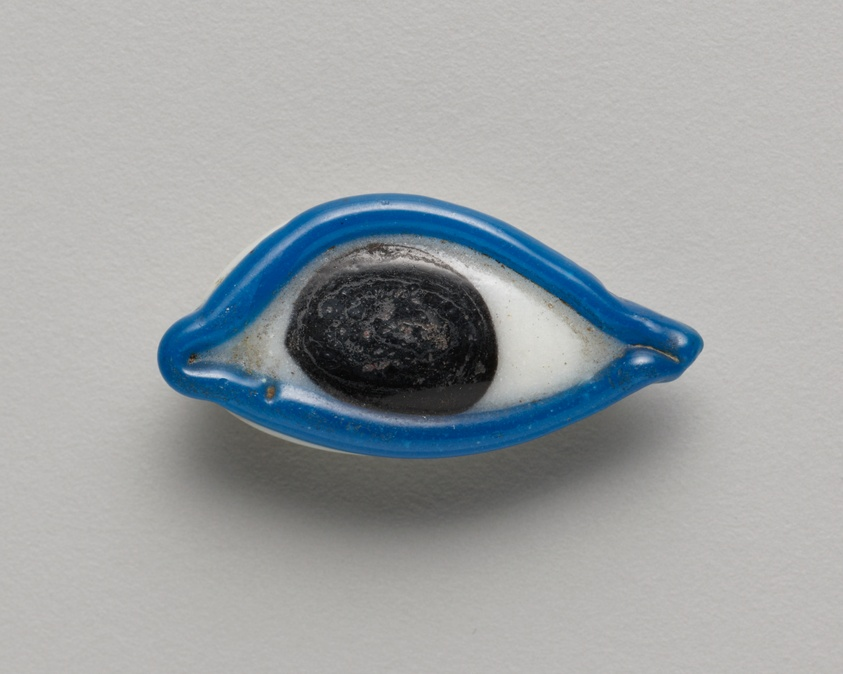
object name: Costume and Accessories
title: Amulet of a Left Eye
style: greco-roman (egyptian), ancient, egyptian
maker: Egyptian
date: New Kingdom–Late Period (about 1550–332 BCE)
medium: Glass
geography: Egypt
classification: amulet; jewelry; glass; ancient art; costume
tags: eyes